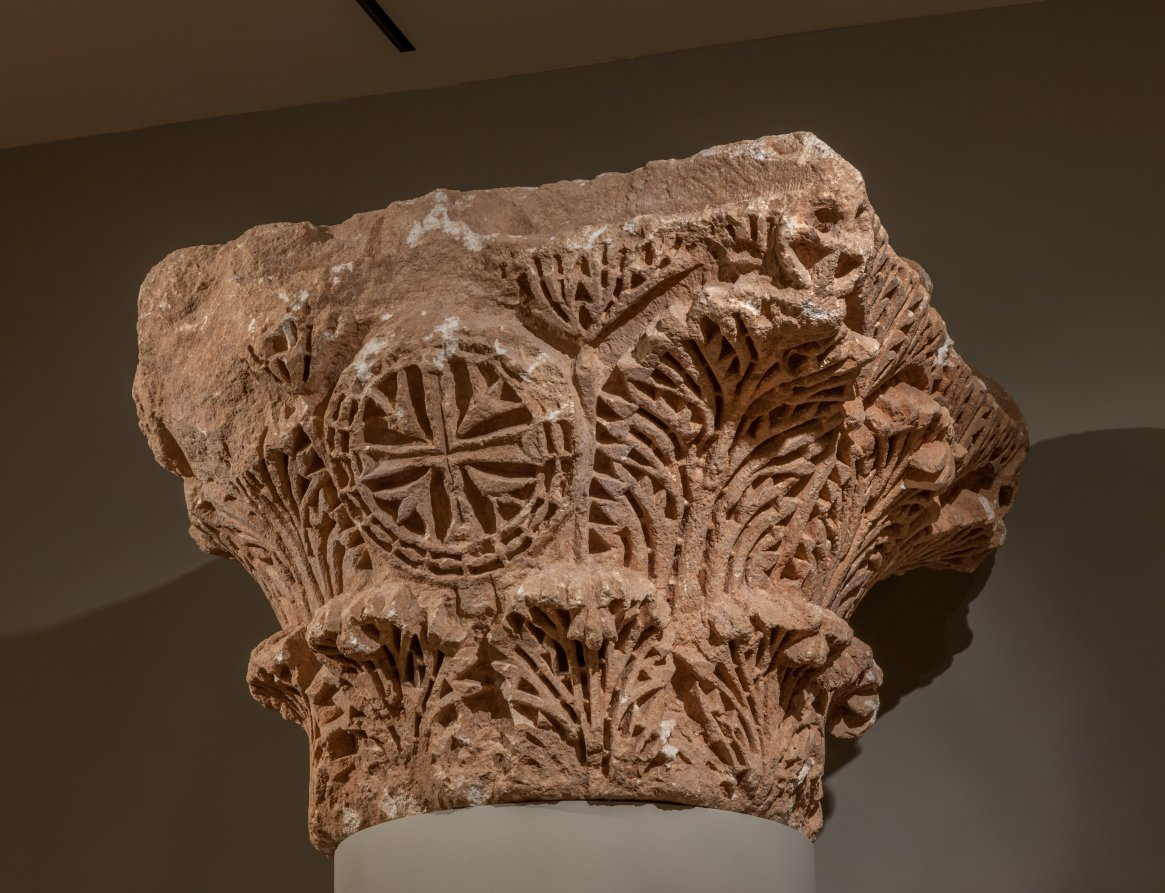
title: Capital with Acanthus and Crosses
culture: Byzantium, Northern Syria, Byzantine period, 5th century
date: 400s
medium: limestone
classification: Sculpture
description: These capitals - the Capital with Acanthus and Crosses and the Engaged Capital with Windblown Acanthus - may have been found in Northern Syria and presumably come from a large and important church. Both capitals are decorated with leaves of acanthus, a fleshy plant with jagged leaves native to the Mediterranean area. One capital is symmetrical with crosses in its ornament, the other is asymmetrical and gives the impression of windblown leaves.